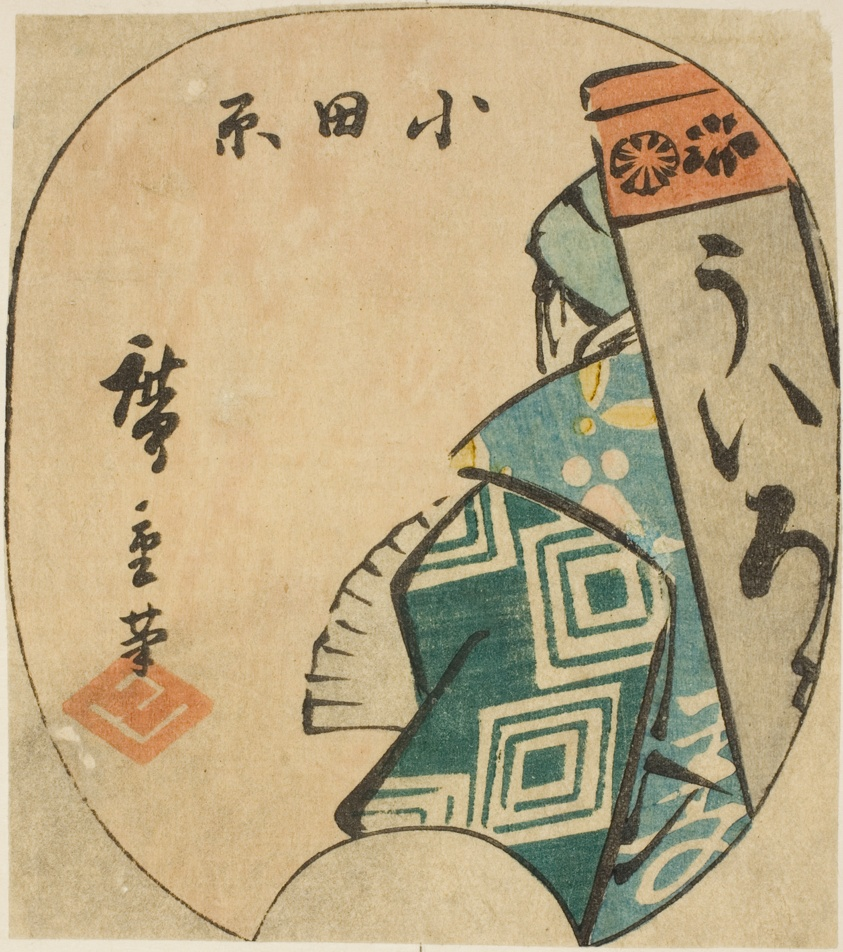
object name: Print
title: Odawara, section of sheet no. 3 from the series "Cutout Pictures of the Tokaido (Tokaido harimaze zue)"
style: Japanese (culture or style)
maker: Utagawa Hiroshige 歌川 広重; Japanese, 1797-1858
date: c. 1848/52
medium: Color woodblock print; section of harimaze sheet (uncut sheet: 1939.1291)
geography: Japan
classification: woodblock print; print; asian art